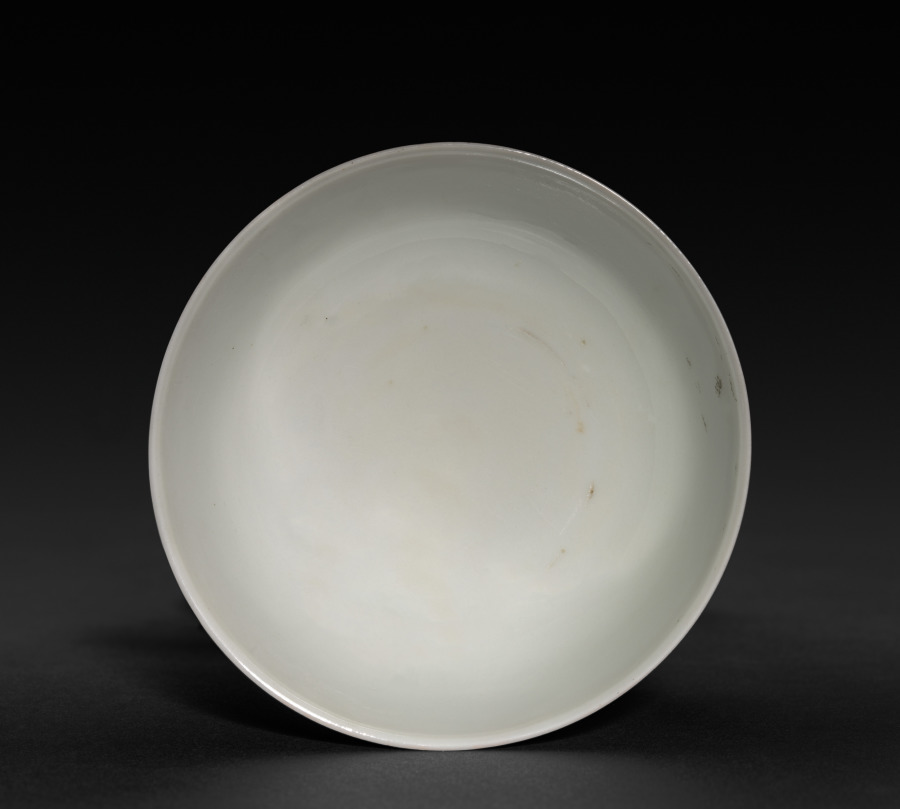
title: Bowl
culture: China, Jiangxi province, Jingdezhen kilns, Qing dynasty (1644-1911), Yongzheng reign (1722-35)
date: 1723–35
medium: porcelain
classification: Ceramic